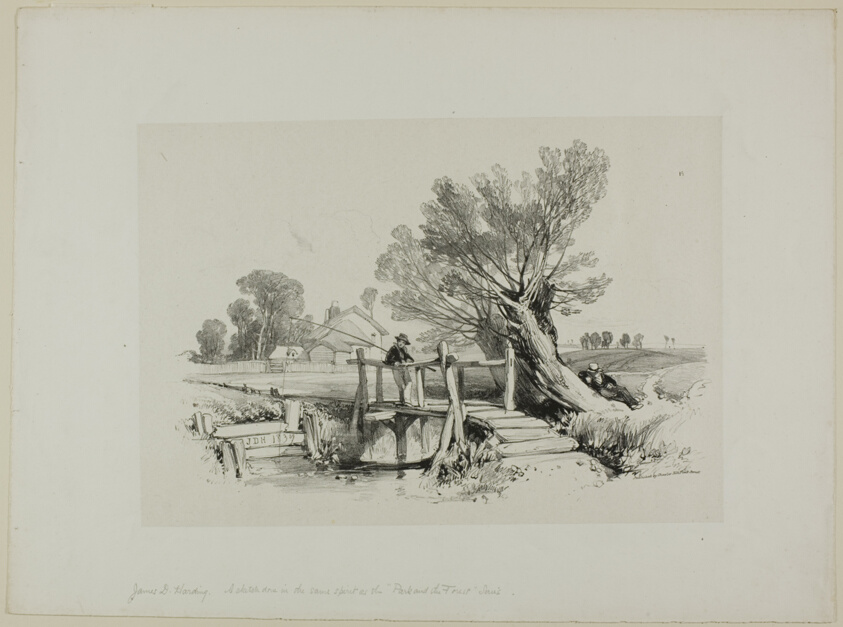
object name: Print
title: Landscape with Boy Fishing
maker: James Duffield Harding (English, 1798-1863)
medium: Lithograph on paper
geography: England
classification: lithograph; print; prints and drawing